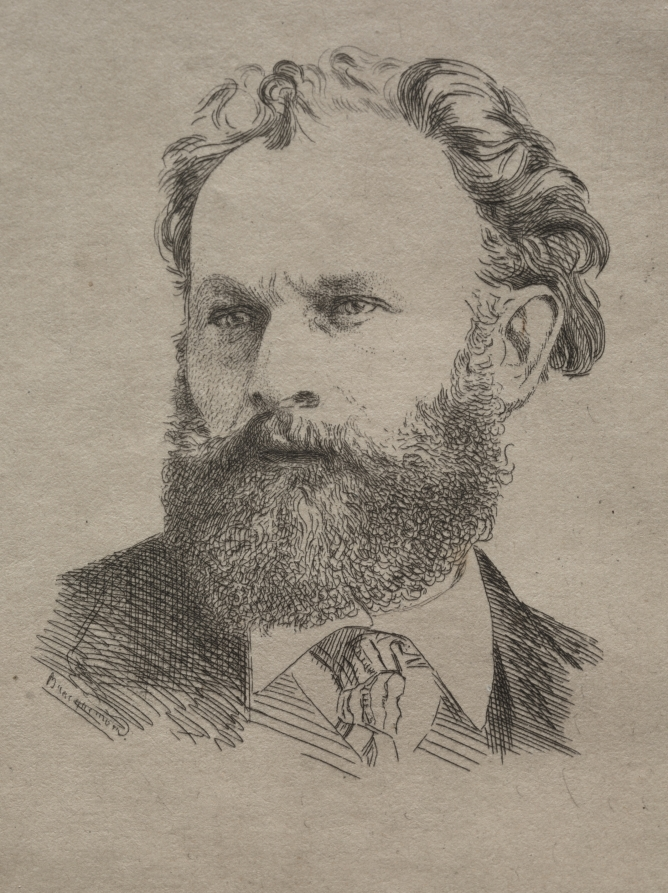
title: Edouard Manet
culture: France, 19th century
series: For "L'Etude sur Manet" by Emile Zola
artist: Félix Bracquemond (French, 1833–1914)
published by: Dentu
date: 1867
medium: etching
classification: Print